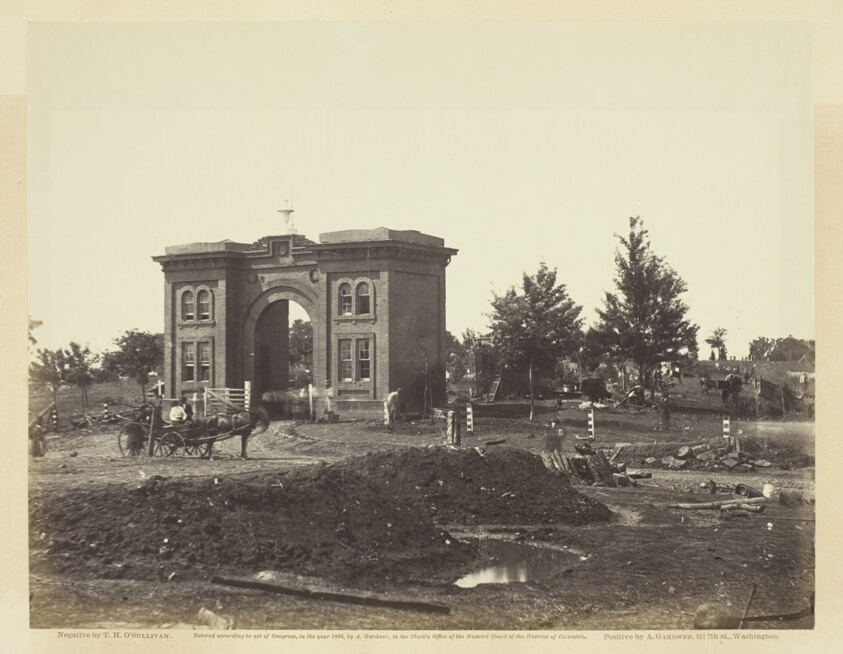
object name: Photograph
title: Gateway of Cemetery, Gettysburg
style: 19th century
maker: Timothy O'Sullivan (American, born Ireland, 1840–1882)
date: July 1863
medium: Albumen print, pl. 39 from the album "Gardner's Photographic Sketch Book of the War, vol. 1" (1866)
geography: United States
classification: photograph; albumen silver print; photography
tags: Collected by Hugh Edwards, Gardner's Photographic Sketch Book